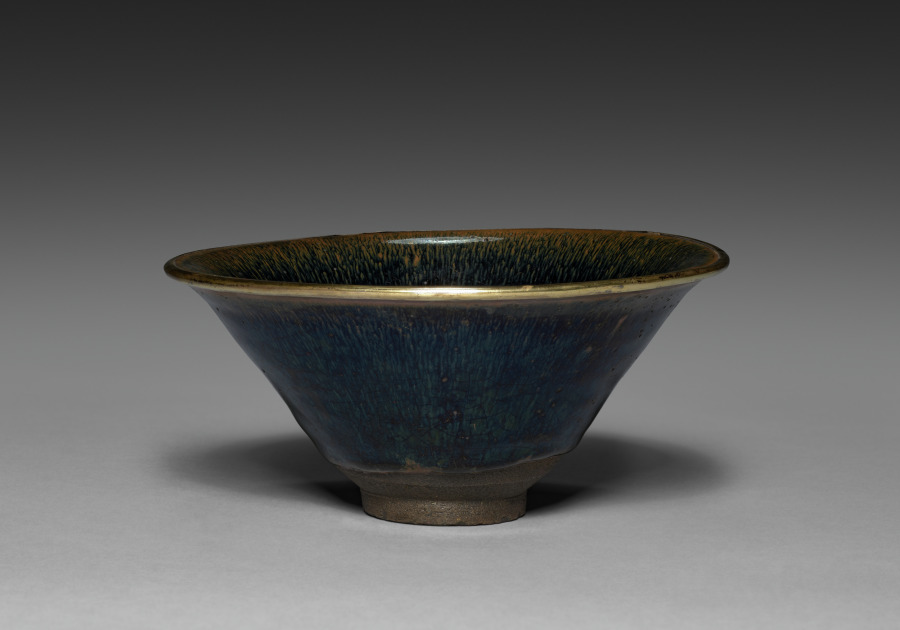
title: Tea Bowl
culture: China, Fujian province, Southern Song dynasty (1127-1279)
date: 1100s–1200s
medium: Stoneware with black “hare’s fur” glaze and metal-bound rim, Jian ware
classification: Ceramic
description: Due to its exceptional size, this Fujian tea bowl is rather rare. The enjoyment of Jian ware rests with the glaze transmutation due to iron in the glaze, which developed into reddish-brown streaks and spots against a rich black glaze after firing. Connoisseurs called these iron formations "hare’s fur" marks, and the ware was very popular with the tea cultures in China and Japan.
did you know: The reddish-brown streaks and spots have been affectionately termed "hare's fur" among connoisseurs.